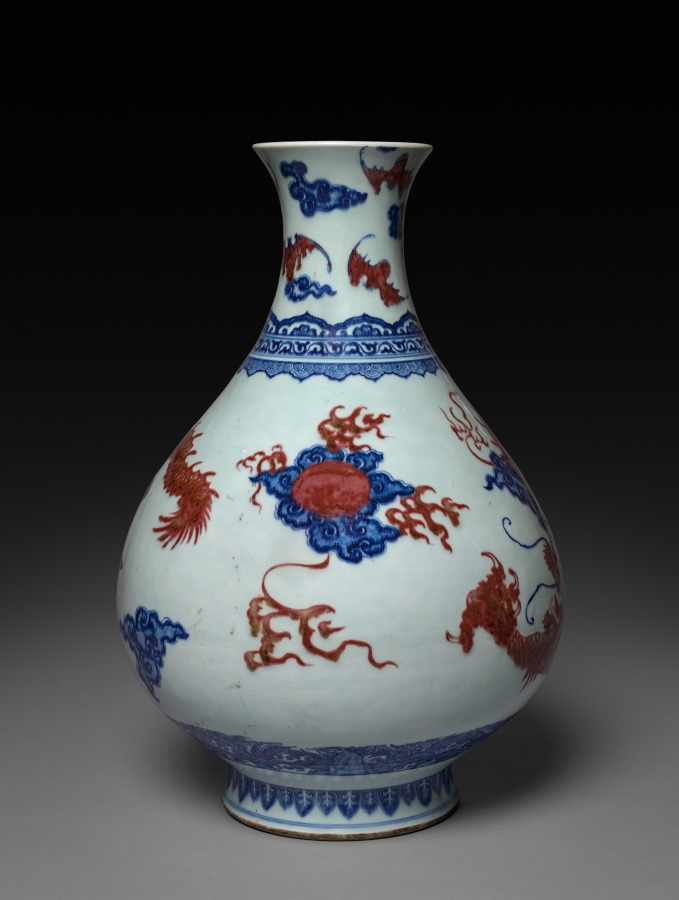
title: Vase with Dragon and Cloud Decoration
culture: China, Qing dynasty (1644-1911), Yongzheng reign (1723-35)–Qianlong reign (1736-95)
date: mid- to late 1700s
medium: porcelain with underglaze blue and red decoration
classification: Ceramic